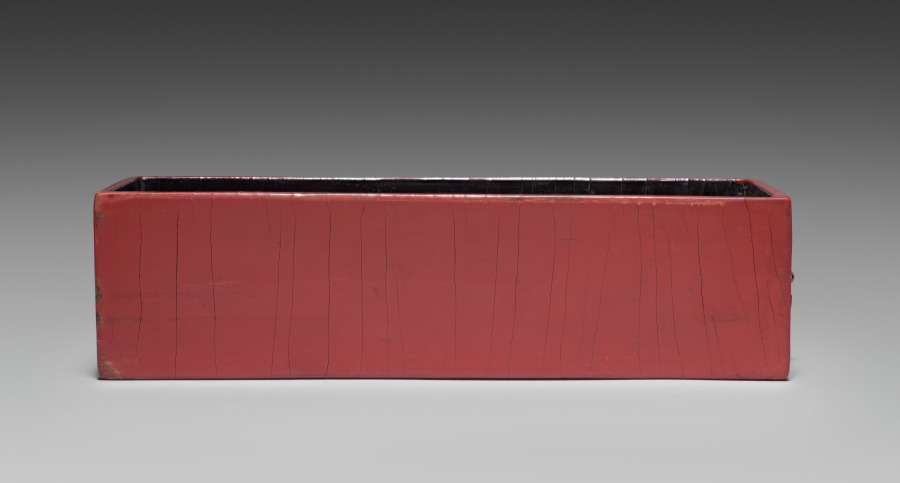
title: Drawer for a Tihong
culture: China, Ming dynasty (1368-1644), Wanli reign (1572-1620)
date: 1585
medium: carved cinnabar lacquer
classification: Lacquer